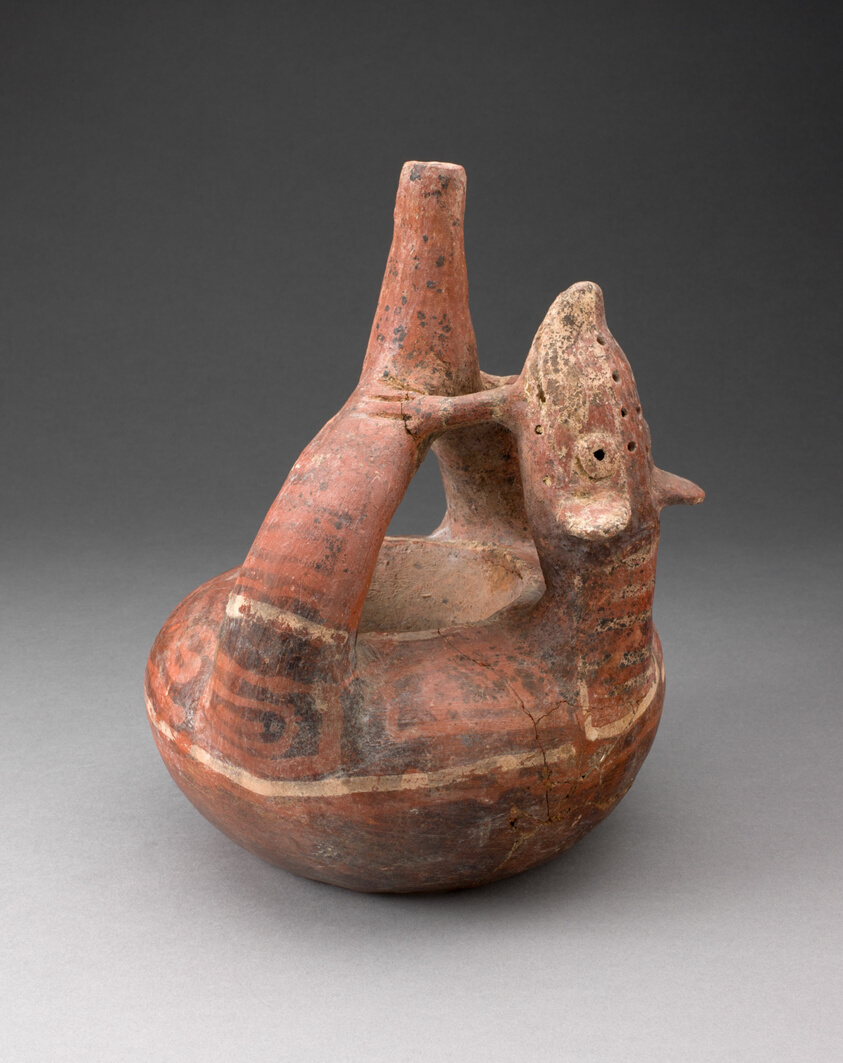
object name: Vessel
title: Stirrup Spout Vessel with Circular Body and Molded Head and Arms of Animal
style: gallinazo, early intermediate period, Pre-Columbian, americas, Arts of the Americas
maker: Gallinazo (Virú or Moche Valley, north coast, Peru)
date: 200 BCE–200 CE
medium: Ceramic and pigment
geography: Peruvian North Coast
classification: earthenware; ceramics; vessel; art of the americas